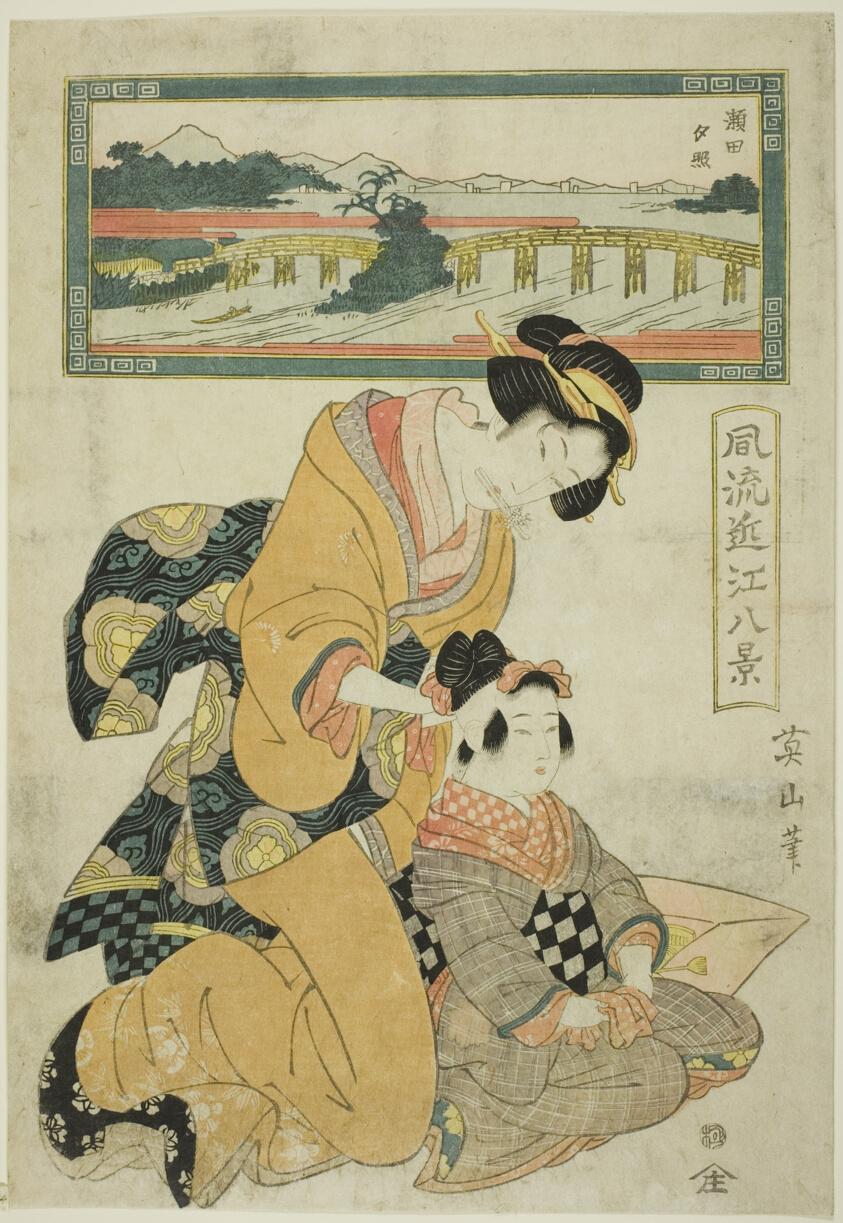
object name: Print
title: Evening Glow at Seta (Seta sekisho), from the series "Fashionable Eight Views of Omi (Furyu Omi hakkei)"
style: Japanese (culture or style)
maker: Kikukawa Eizan (Japanese, 1787-1867)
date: c. 1814/17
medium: Color woodblock print; oban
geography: Japan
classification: woodblock print; print; asian art